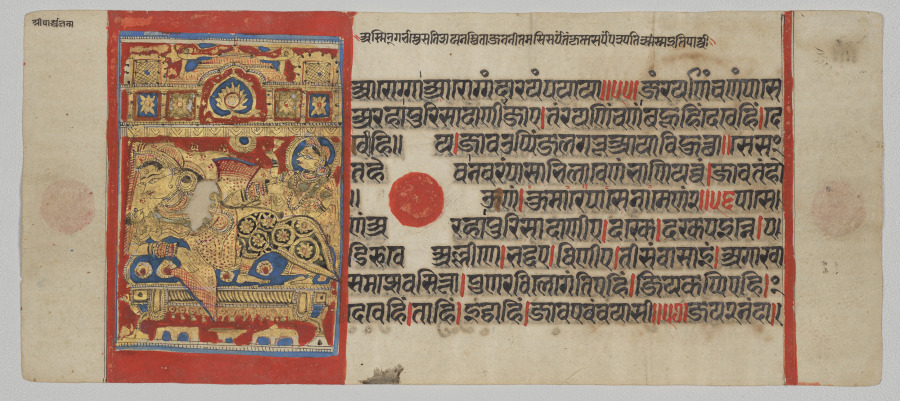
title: Birth of Parshva, Folio 45 (recto), from a Kalpa-sutra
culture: Western India, Gujarat, late 15th-early 16th century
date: c. 1500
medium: Gum tempera, ink, and gold on paper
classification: Painting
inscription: [[upper left]] Śrī Pārśva janma